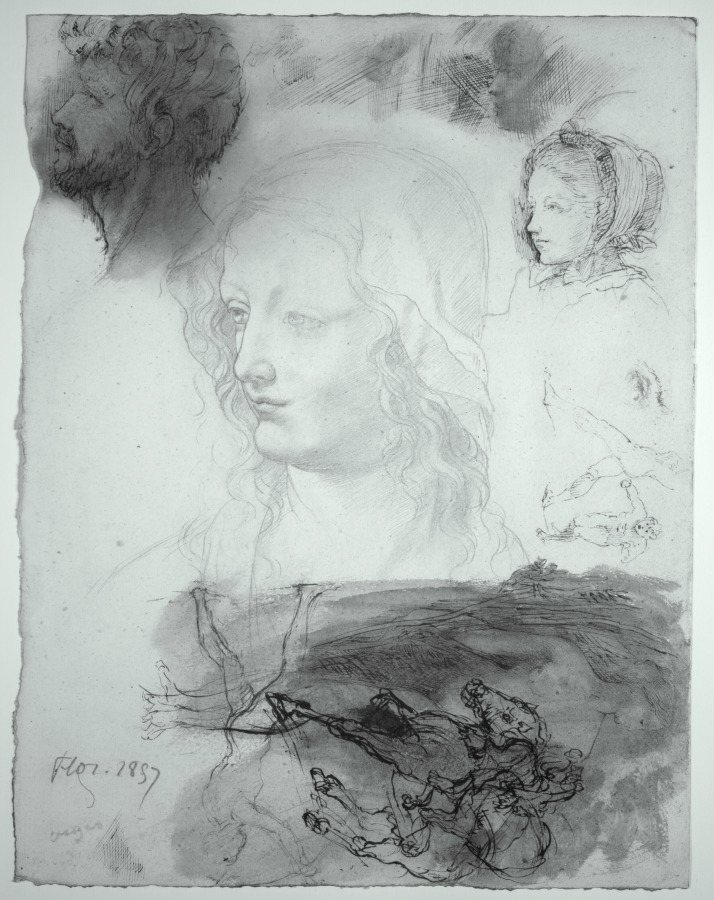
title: Sheet of Studies and Sketches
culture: France, 19th century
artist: Edgar Degas (French, 1834–1917)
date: 1858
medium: graphite, pen and dark brown ink, and watercolor on thick ivory wove paper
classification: Drawing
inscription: Inscribed, lower left, in graphite: Flor. 1857; stamped, lower left, in red ink: artist’s stamp [Lugt 658]; verso, in red ink: estate stamp [Lugt 657]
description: Degas traveled to Florence, Italy, in July 1858, where he made this sheet of studies. The featured imagery is fragmented and dissociated, suggesting the young artist's engagement with art of the past. The refined female head drawn at center in graphite was copied from a drawing then attributed to Leonardo da Vinci in the Uffizi Gallery's collection. Other sketches record Degas's responses to Florentine sculpture. At upper right, he sketched an informal portrait of his cousin Giulia Bellelli, probably from life.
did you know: The date Degas wrote on this drawing is incorrect; he didn't visit Florence until 1858, and must have inscribed the sheet years later.